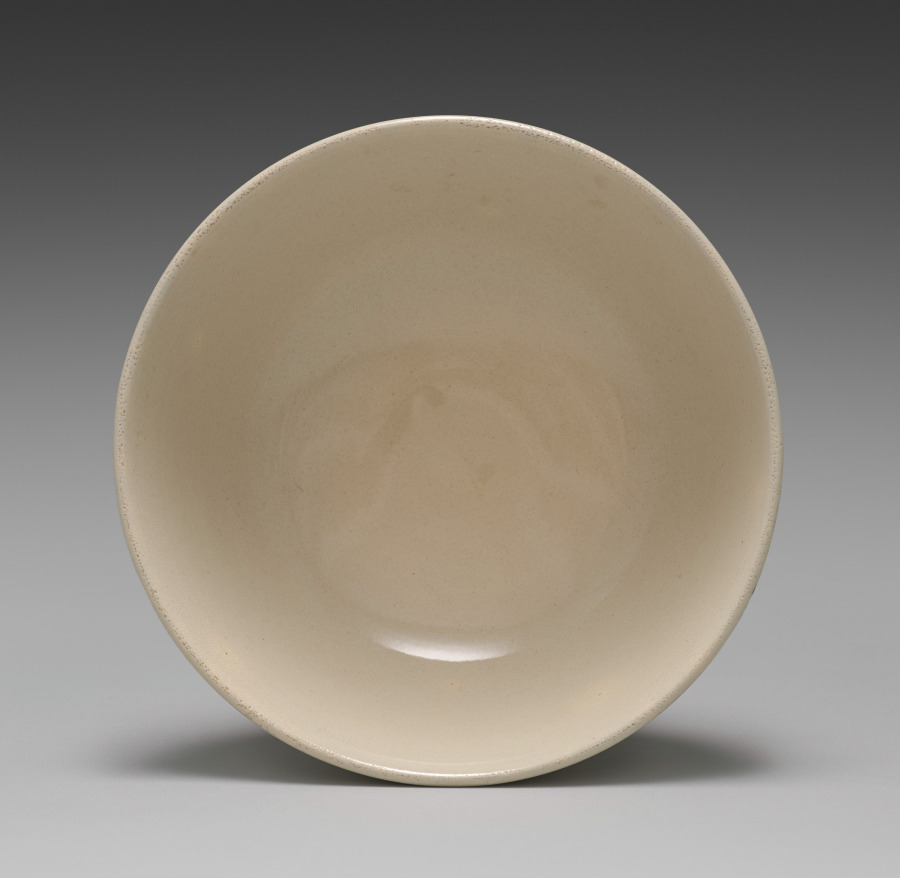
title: Bowl with Chrysanthemums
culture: Japan, Taishō period (1912–26) or Shōwa period (1926–89)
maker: Seifū Yohei IV (Japanese, 1872–1951)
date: 1914–46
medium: Stoneware with underglaze iron oxide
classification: Ceramic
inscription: 清風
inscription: 菊画/ 鉢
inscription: The inside of the box lid has a seal indicating that the bowl was included in a renewal opening of the gallery Manjudo in Tokyo.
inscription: 清風造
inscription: 成山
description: The chrysanthemums in underglaze iron oxide of this bowl of Kyoto ware have a casual feel, which is emphasized by the bowl's shape. When held, the its slightly ridged body would gently massage one’s palms, contributing to the sensory, tactile experience of the piece and possibly generating a sense of comfort and ease. The inside of the box lid has a seal indicating that the bowl was included in a renewal opening of the gallery Manjudo in Tokyo.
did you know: Stoneware works of this type are classified as Kyoto ware, after the city where the style developed.